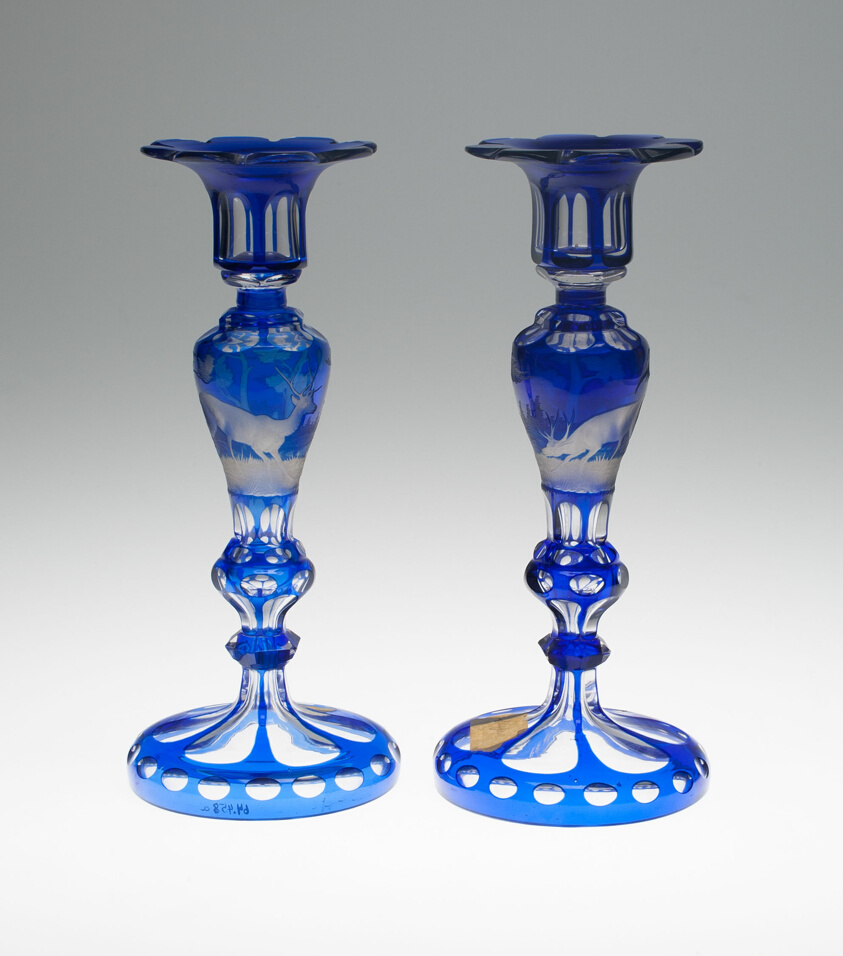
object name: Glass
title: Pair of Candlesticks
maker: Bohemia, Czech Republic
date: 1850/75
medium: Glass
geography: Bohemia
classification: candleholder - candlestick; glass; candleholder; european decorative arts